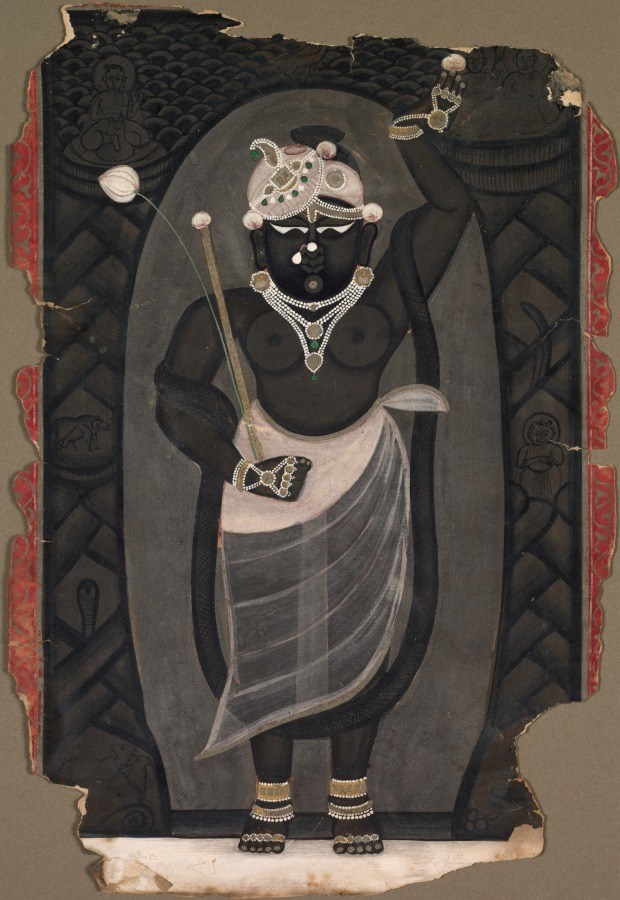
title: Sri Nathaji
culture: Northwestern India, Rajasthan, Rajput Kingdom of Kota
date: c. 1900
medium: Gum tempera on paper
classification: Painting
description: This painted depiction of the black stone sculpture regarded by followers of the Pushti Marg sect as Shri Nathji, a living embodiment of Krishna, includes all the elements carved into the monolithic stele behind the figure. Snakes, beasts, and yogis occupy a wild, rocky landscape. Priests have dressed the figure in light garments, indicative of a hot season, and applied a turban, jewelry, and eyes, which look down upon devotees who would be worshiping at his feet. This painting probably stood on a domestic shrine for daily devotions and served as a memento of a pilgrimage to Nathdwara.